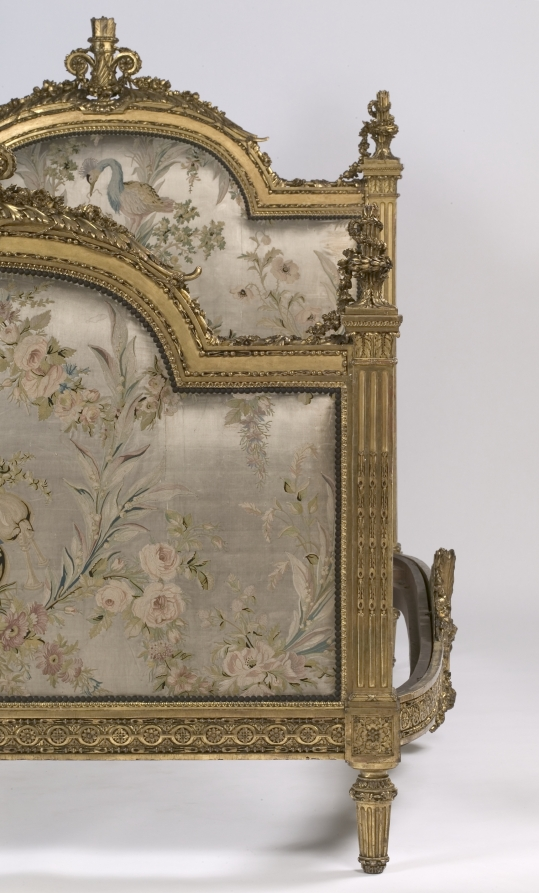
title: Bed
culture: France, 18th century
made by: attributed to Georges Jacob (French, 1739–1814)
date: 1700s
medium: gilded wood and embroidered satin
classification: Furniture and woodwork